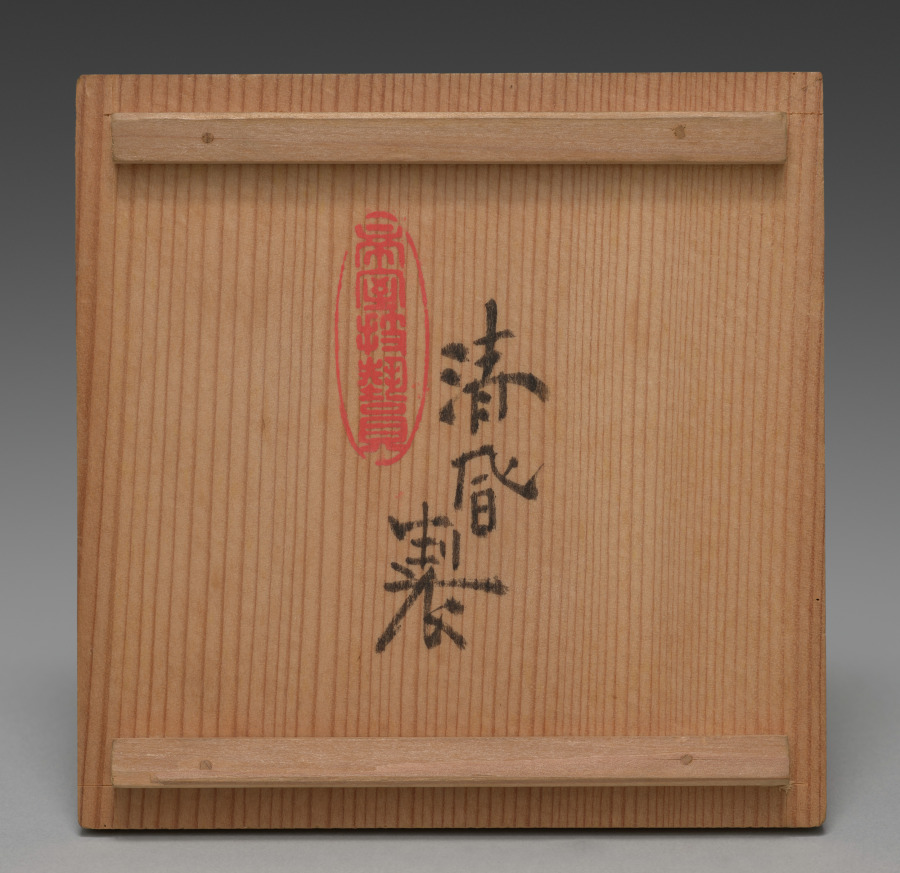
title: Teapot with Chrysanthemum Motifs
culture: Japan, Meiji period (1868–1912)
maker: Seifū Yohei III (Japanese, 1851–1914)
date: 1912–14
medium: Porcelain with overglaze color enamel and gold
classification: Ceramic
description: This side-handled sencha teapot has the lid flush against the body, forming an oblong orb. It is decorated with a sprinkling of similar chrysanthemum motifs in red, green, and purple overglaze color enamels with centers of pale red dotted with gold.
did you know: This teapot with chrysanthemum motifs shows off Seifū Yohei III’s technique of enamels painted over the glaze.